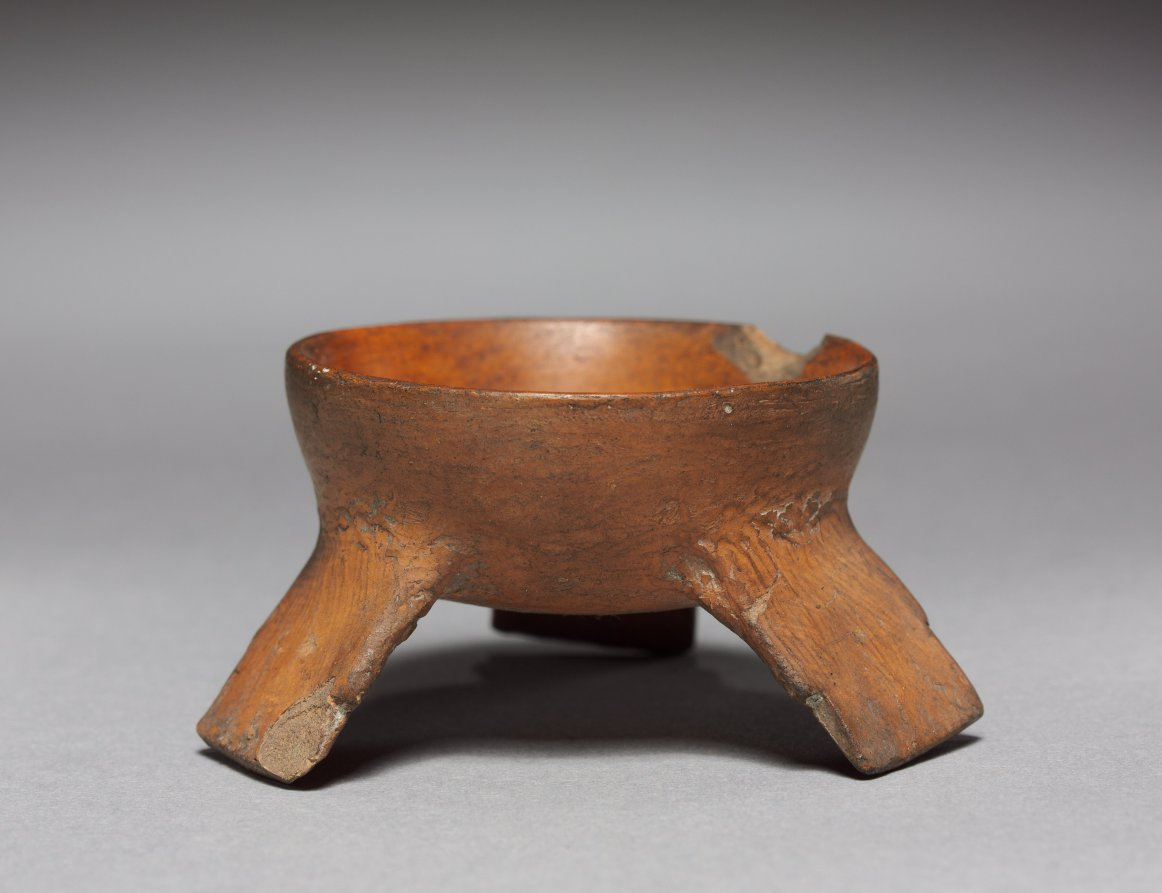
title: Tripod Dish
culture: Mexico, Aztec, 14th-16th century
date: 1325–1521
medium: terracotta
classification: Ceramic